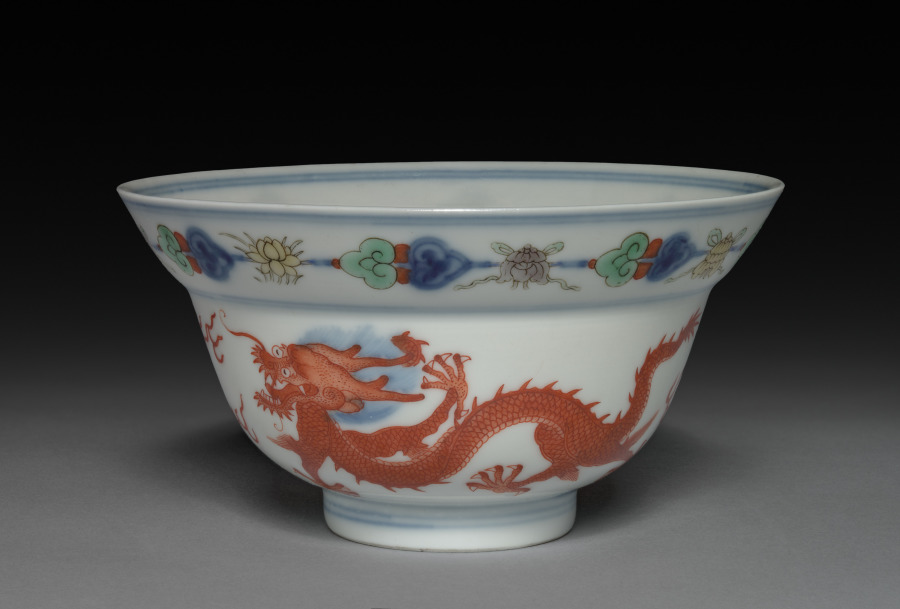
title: Bowl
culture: China, Jiangxi province, Jingdezhen kilns, Qing dynasty (1644-1911), Yongzheng mark and reign (1722-35)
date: 1723–35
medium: porcelain with doucai decoration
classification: Ceramic